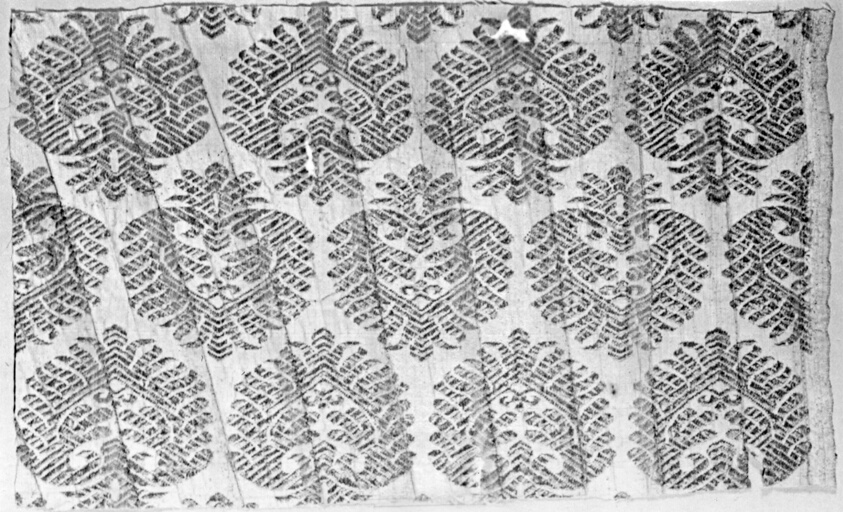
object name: Textile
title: Fragment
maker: Italy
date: 1650/1700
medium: silk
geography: Italy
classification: textile; weaving